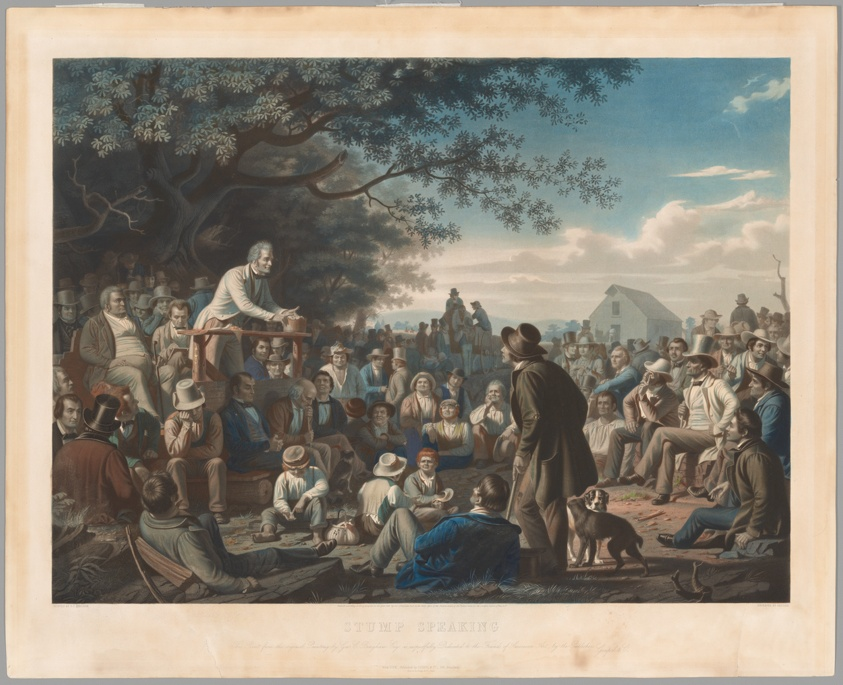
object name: Print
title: Stump Speaking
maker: Louis-Adolphe Gautier (French, active 1847-1876); after George Caleb Bingham (American, 1811-1879)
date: 1856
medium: Hand-colored aquatint, engraving, and mezzotint on ivory wove paper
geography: United States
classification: print; paper; prints and drawing; mezzotint; engraving; aquatint